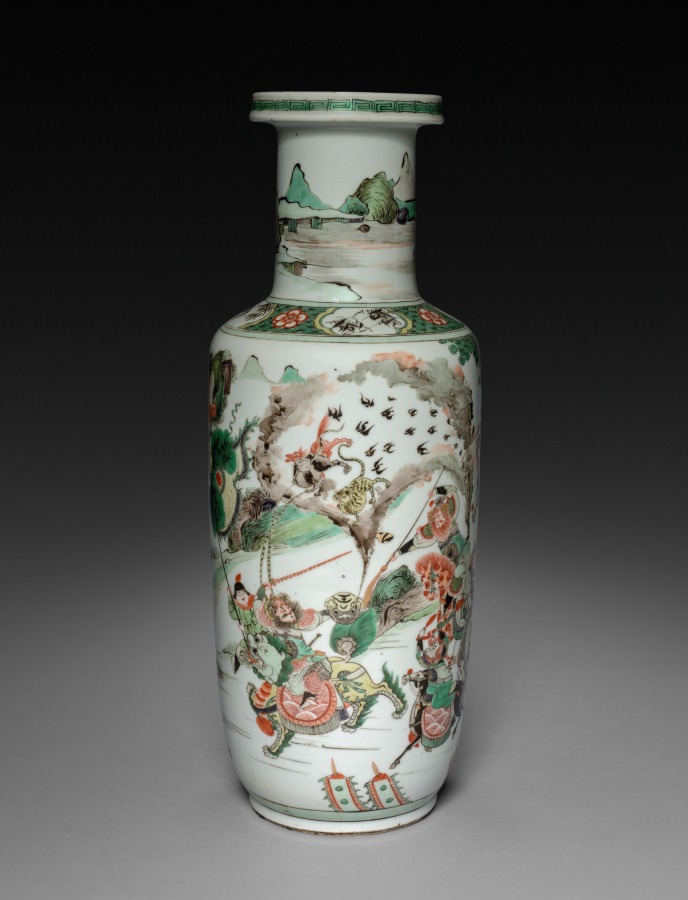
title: Vase with Decoration of Horsemen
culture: China, Qing dynasty (1644-1911), Kangxi reign (1662-1722)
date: 1622–1722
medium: porcelain with famille verte overglaze enamel decoration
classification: Ceramic